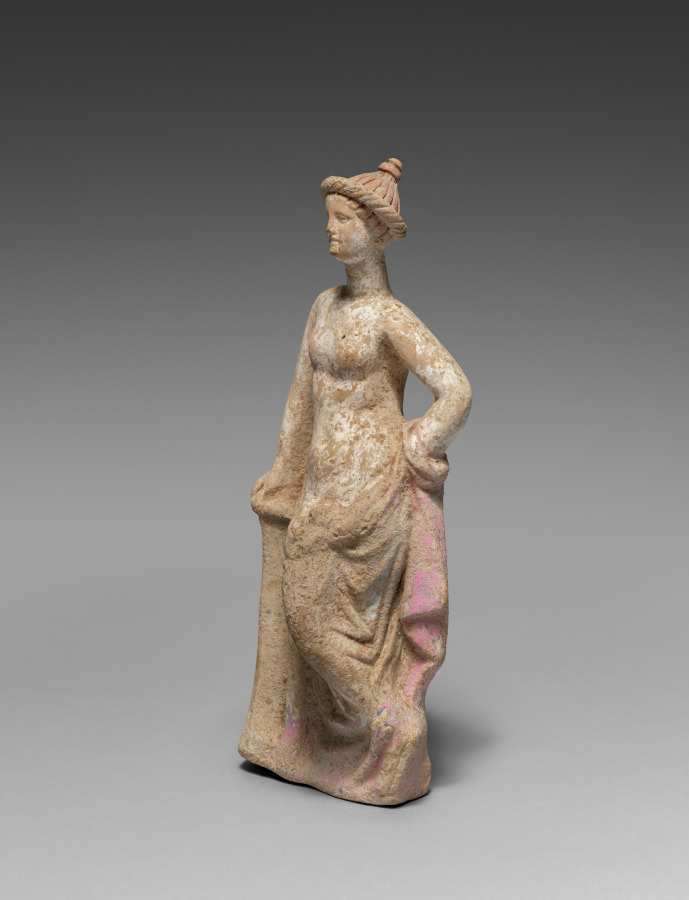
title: Figurine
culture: Greece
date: 300–100 BCE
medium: terracotta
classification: Sculpture